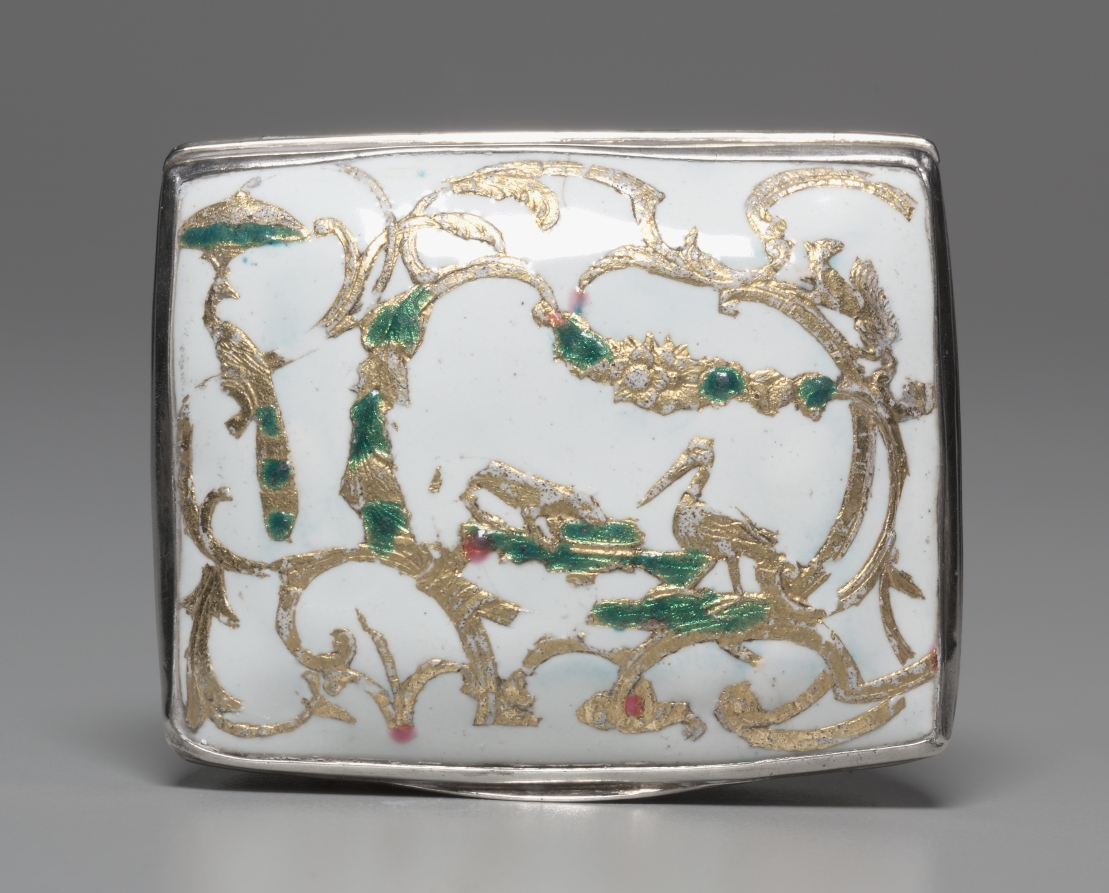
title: Box (Boîte)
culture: possibly France, mid-18th century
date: 1730–40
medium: enamel and gold leaf on copper mounted in silver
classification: Miscellaneous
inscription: [Traces of marks on mounts, too rubbed to be legible. One has previously been identified as possibly a French discharge mark of middle-18th century (Beuque 669 or 687). Maybe the discharge mark for small work of Hubert Louvet, Paris, 1732-38, left side of rim.]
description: Chinoiserie in 18th-century France incorporated imitations of East Asian motifs, designs, and ornaments into European art. These imitations were often distorted by the European imagination and were not accurate representations of the cultures from which they drew inspiration. Motifs typical of chinoiserie can be seen in this box’s floral patterns and repeated representations of pagodas, dragons, and peacocks.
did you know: The depictions of various animals and plants on this box have been covered in a very thin layer of gold called gold leaf.